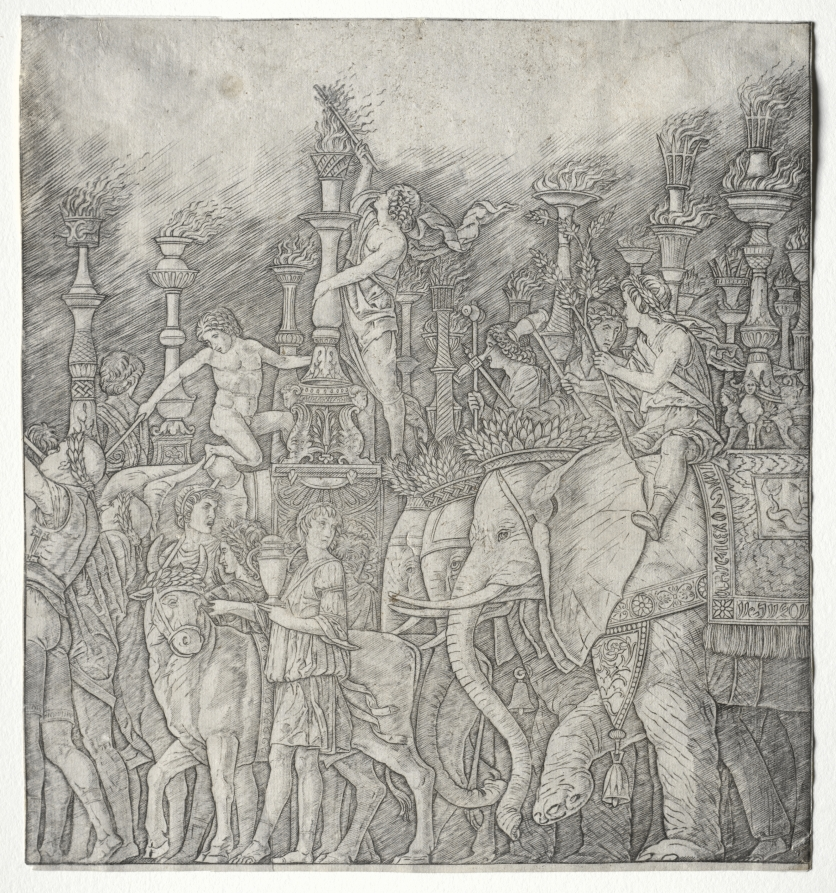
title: The Triumphs of Caesar: The Elephants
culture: Italy, 15th century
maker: Giovanni Antonio da Brescia (Italian, about 1460–about 1520)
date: late 1400s–early 1500s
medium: engraving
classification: Print